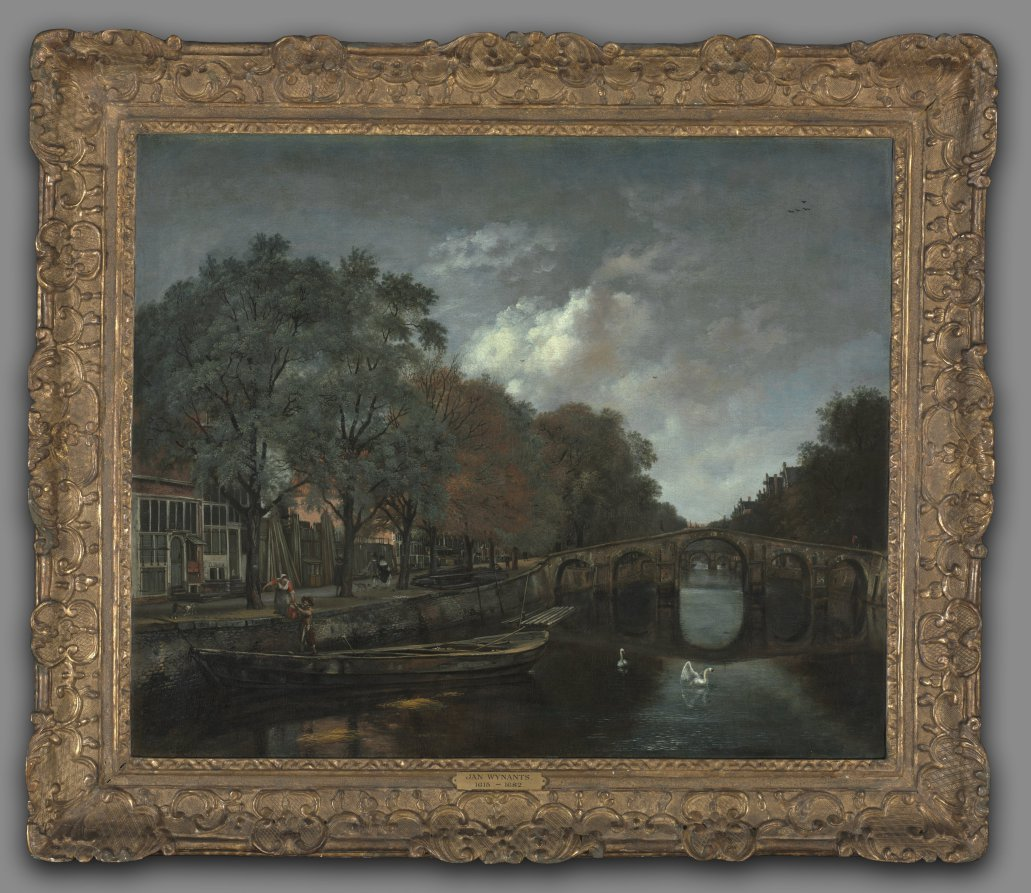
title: Herengracht, Amsterdam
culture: Netherlands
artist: Jan Wijnants (Dutch, 1635–1684)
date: c. 1661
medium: oil on canvas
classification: Painting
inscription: Signed lower left: "J. Wijnants [with remains of an inscription below]"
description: This painting is the first depiction of Amsterdam in which a canal is given prominence. Flanked by picturesque, tree-lined avenues and exquisite mansions, the Herengracht (Gentleman's Canal) was one of Amsterdam's most important waterways. The precision with which Jan Wijnants portrayed the topography of the city enables the viewer to witness the development of this location. To the left of the canal, Wijnants depicted a lumber yard, on which, in 1662, the architect Philip Vingoboons built four houses for the merchant Jacob Cromhout. Furthermore, soon after Wijanants completed this painting the canal was expanded.